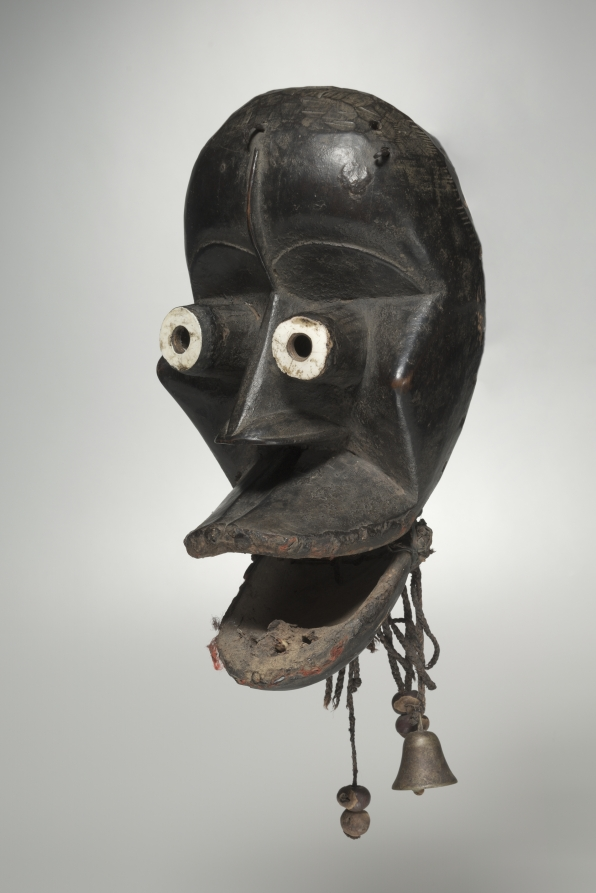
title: Mask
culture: Africa, West Africa, Liberia, Mano-style carver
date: early 1900s, before 1933–37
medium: Wood, copper alloy, plant fiber, cloth, rawhide or leather, teeth, seeds, resin, synthetic material, iron, and glass beads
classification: Mask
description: Generally, Mano masks are considered to be manifestations of forest spirits and can be grouped into 11 major types relating to aspects of social control, political and judicial matters, peacemaking, education, competition, and entertainment. This mask was acquired in Liberia by the medical missionary George Harley between 1933 and 1937.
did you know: The jaw of this mask is hinged, allowing it to open and close.